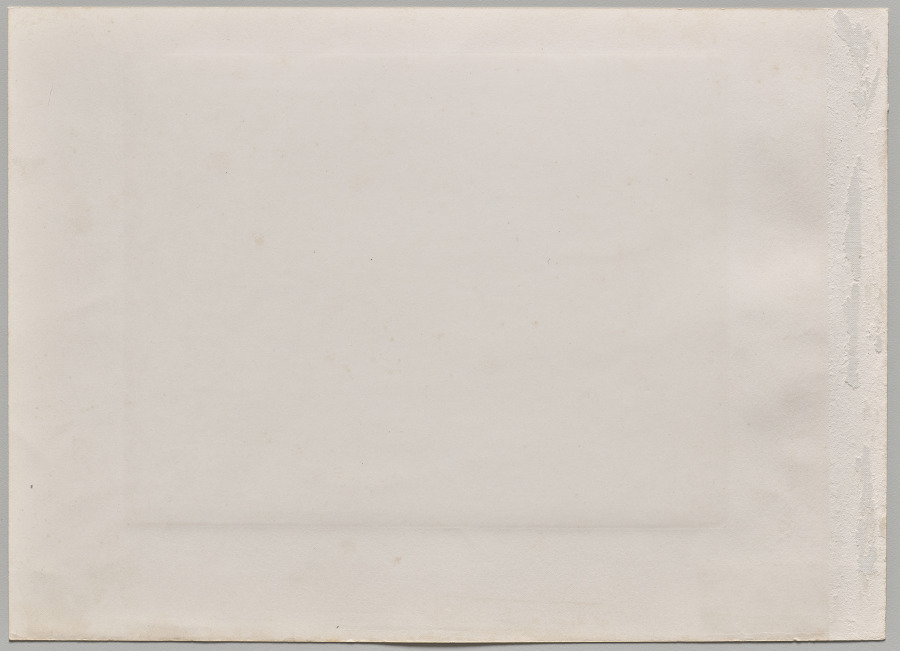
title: Caves of Karlie: No. 1, The Approach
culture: India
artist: William Johnson (British, active India, 1852–1868)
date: 1855–62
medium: albumen print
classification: Photograph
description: This early view of the entrance to the ancient Karlie, or Karla, Caves in Western India shows the site before its restoration, including the monumental entrance pillar topped by a sculpture. Windows cut into the rock provided light inside. The shrines, created between the 2nd century BCE and the 5th century CE, provided sanctuary and shelter for monks but also for travelers and traders.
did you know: The largest prayer hall in this complex of Buddhist shrines cut into the rock is a sanctuary 124 feet long with a ribbed vault 45 feet high.